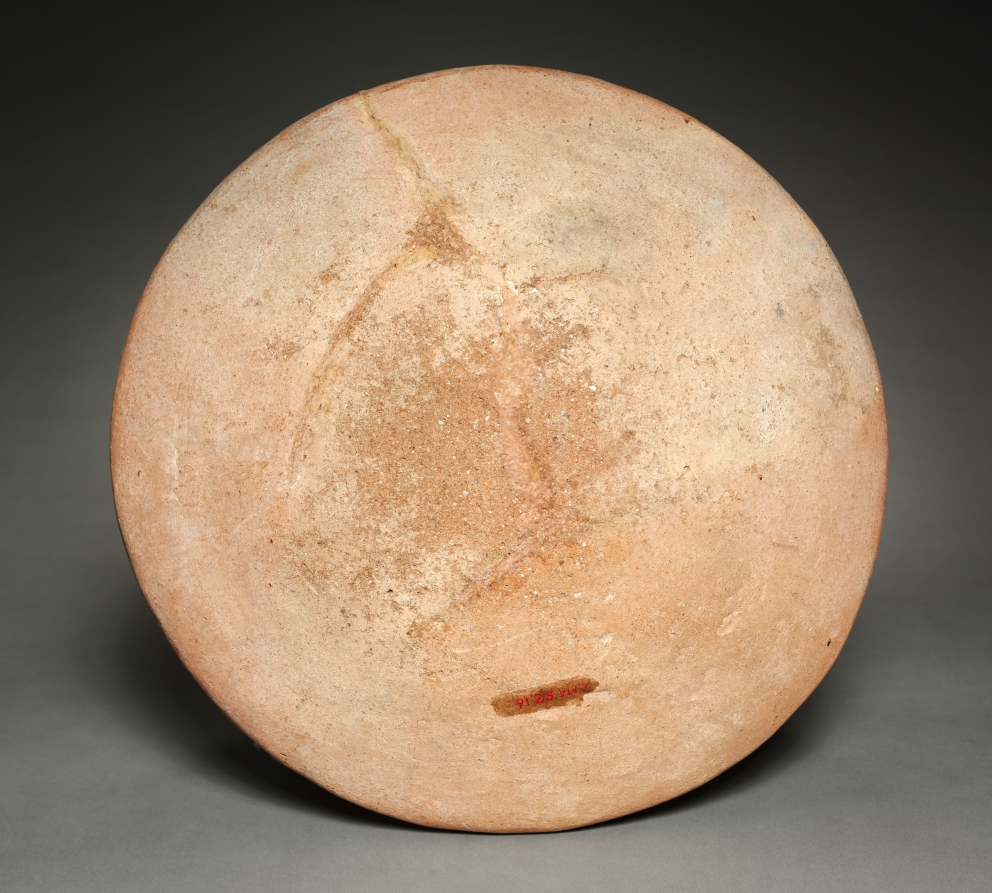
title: Large Storage Jar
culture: Southwest, Arizona, Hohokam, 10th-11th century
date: c. 900–1100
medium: Ceramic, slip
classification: Ceramic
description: The Hohokam Arizona were accomplished agriculturalists whose decline after 1350 was caused partially by drought, and then flooding that overcame irrigation canals. Many Hohokam settlements boasted large public structures including platform mounds and oval ballcourts. The latter reveal contact with Mexico, where the ballgame was a long-established tradition.